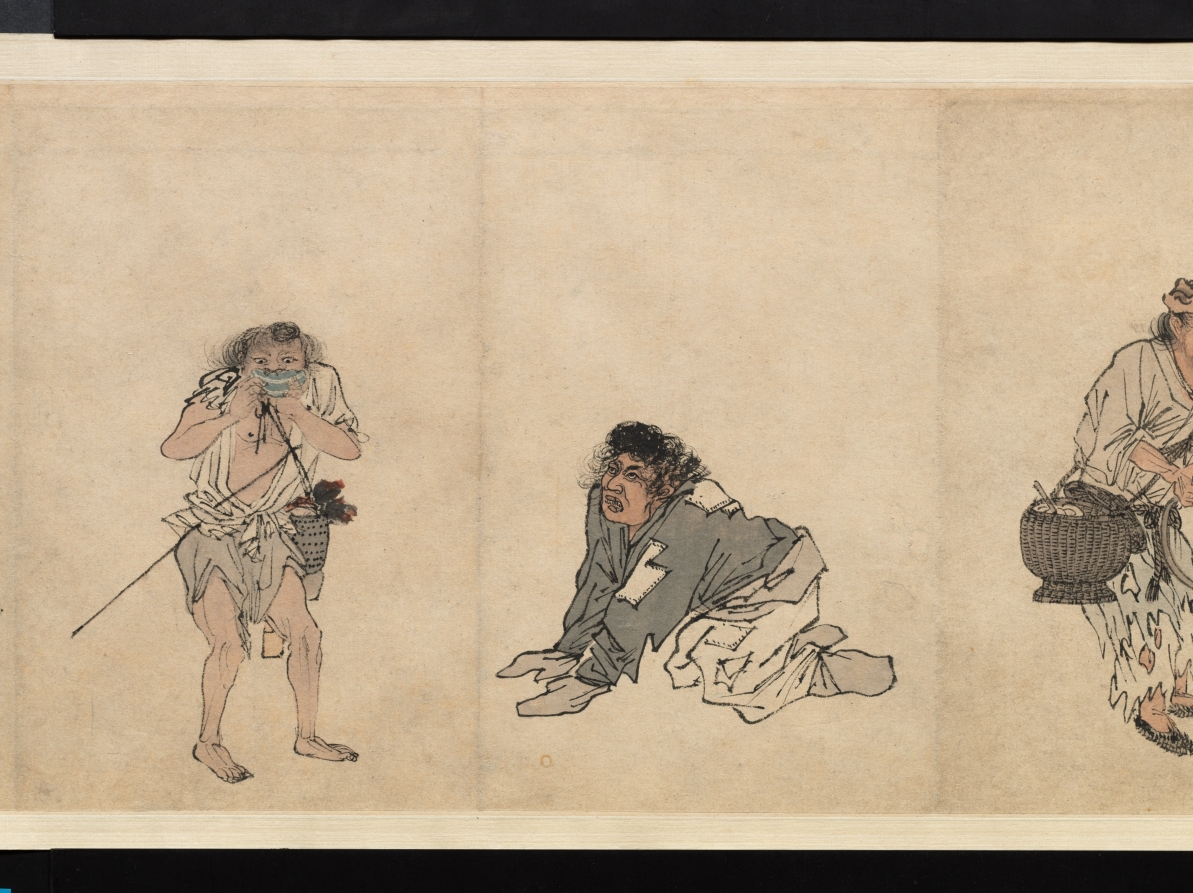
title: Beggars and Street Characters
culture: China, Ming dynasty (1368–1644)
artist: Zhou Chen (Chinese, c. 1450–c. 1536)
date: 1516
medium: Handscroll; ink and light color on paper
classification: Painting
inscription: 題: 周臣流氓圖. 古堇趙鶴琴 [印] 老鶴臨池; 鵝池軒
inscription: 正德丙子秋七月，閒窗無事 ，偶記素見市道丐者種種態度。乘筆硯之便，率爾圖寫。雖無足觀，亦可以助警勵世俗云。 東邨周臣記 [印]東邨; 舜卿; 鵝場散人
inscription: 吳中東邨周君，善丹青，尤長於人物。此圖其所見盛市丐者之狀種種，各盡其態，觀者絕倒。嗟乎，今之晝夜乞哀以求富貴者，安得起周君而貌之耶。臥雲徵君出示，余漫題其後。 甲子歲十月吳門黃姬水 [印] 士雅山人; 另一印不詳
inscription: 是冊凡數種。其飢寒流離疲癃殘疾之狀，種種之異。觀此而不惻然心傷者，非仁人也。計正德丙子逆瑾之流毒已數年。而[江]彬 [錢] 寧輩肆虐方熾。意分符剖竹諸君，亦鮮有能撫字其民者。然則舜卿此作，殆與鄭君 流民圖同意。其有補於治道者不淺，要不可以墨戲忽之也。 長洲張風翼題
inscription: 東村此筆，蓋圖寫飢寒乞丐之態，以警世俗耳。而質山 [黃姬水]欲其寫昏夜乞哀，而靈墟[張鳳翼]則擬之於安上門圖。二君之見，其各有所指哉。昔唐六如每見周筆，輒稱曰：周先生！蓋深服其神妙之不可及。若此冊者，信非他人可能而有符於六如之心伏矣。豈易得耶。若黃、張之指，則又論於畫之外，不在於形似筆墨之旨也。 萬歷丁丑十二月三日 茂苑文嘉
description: Zhou Chen from Suzhou provides rare depictions of impoverished people that once filled the city’s markets and streets. Despite Suzhou’s prosperity, its rapid growth polarized society, including the wealthy and those who had deserted their farmlands, who were without homes, unemployed, or sick. Amid these are figures who inspire fear rather than empathy. The painting may thus be informed by local practices at the end of the lunar year, in which street beggars, in exchange for food or money, would dress up like ghosts and demons to drive out evil forces.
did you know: Although Zhou Chen's original composition was an album of 24 figures, today it is mounted as two handscrolls, one in the Cleveland collection and one in the Honolulu Museum of Art.